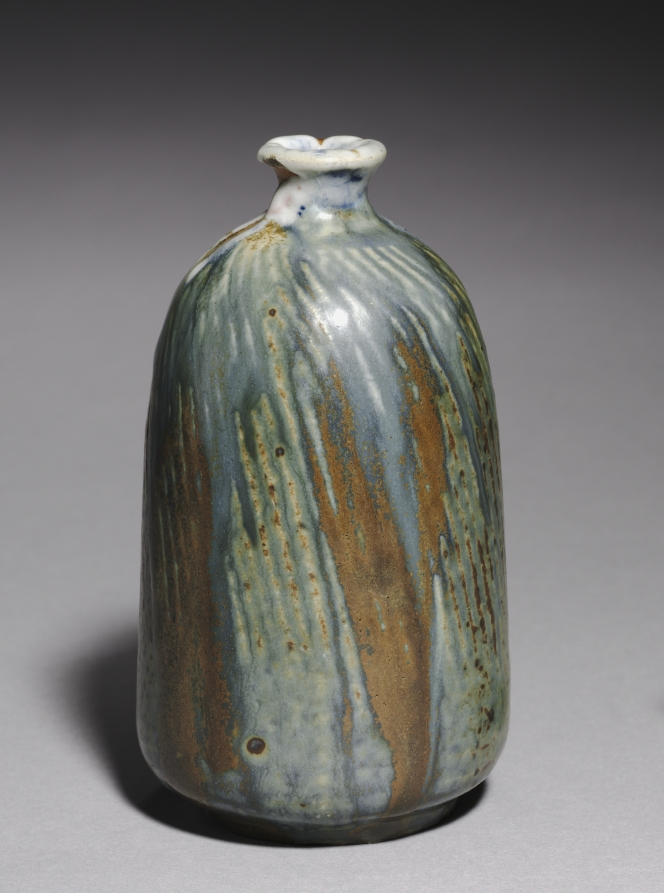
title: Vase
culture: France, 19th century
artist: Jean Carriès (French, 1855–1894)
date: c. 1890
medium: stoneware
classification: Ceramic